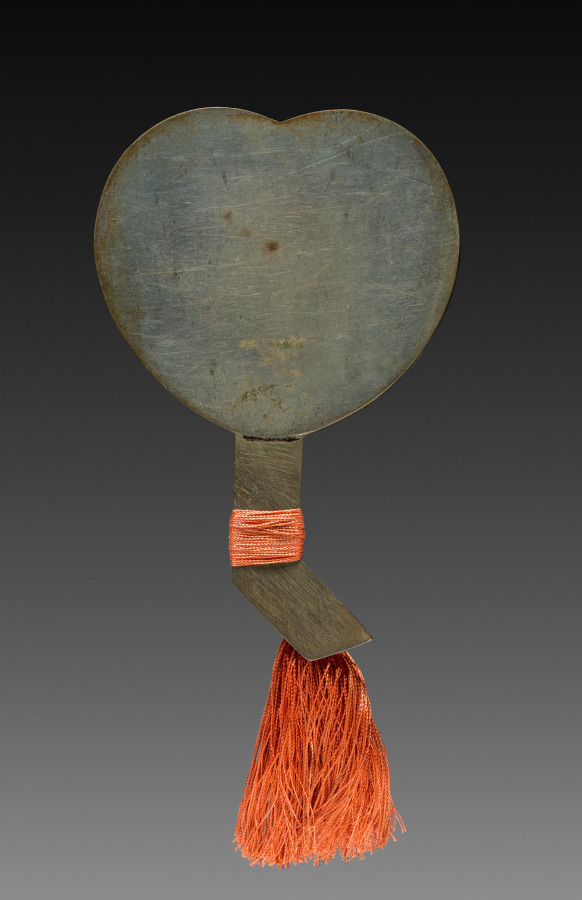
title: Mirror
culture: Japan, Edo period (1615–1868)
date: 1615–1868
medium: bronze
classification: Metalwork